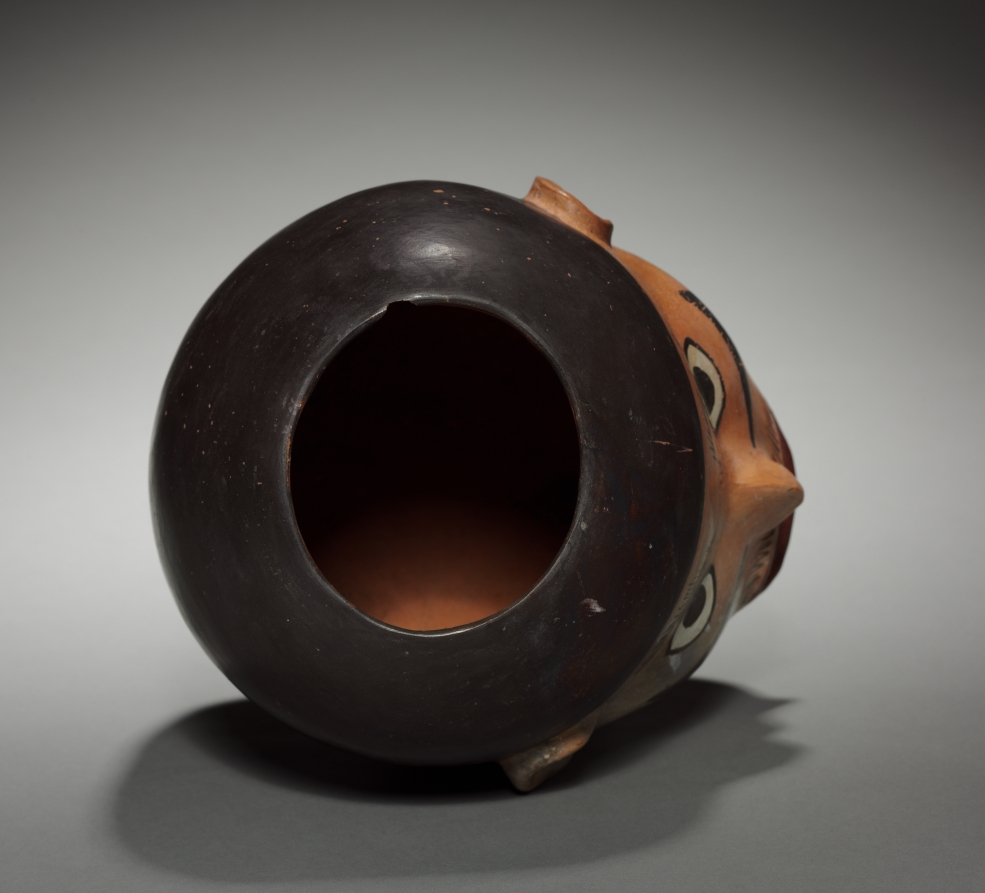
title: Severed Head Effigy Vessel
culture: Peru, South Coast, Nasca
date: c. 100–350 CE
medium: earthenware with colored slips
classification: Ceramic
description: The Nasca people were organized politically into small, competing chiefdoms, and warfare was common. This vessel represents a freshly severed human head (probably that of a captured and sacrificed prisoner) with staring eyes, gaping mouth, and blood-red underside. Modeling of the mouth cavity, tongue, and teeth lends the image a startling realism. Human sacrifice by decapitation was a central element of Nasca religion, essential to agricultural fertility. Severed heads were emptied and dried, then pierced through the forehead and suspended from a thick cord. Such preserved heads have been recovered from offering deposits and from tombs, where they were buried with their captors.